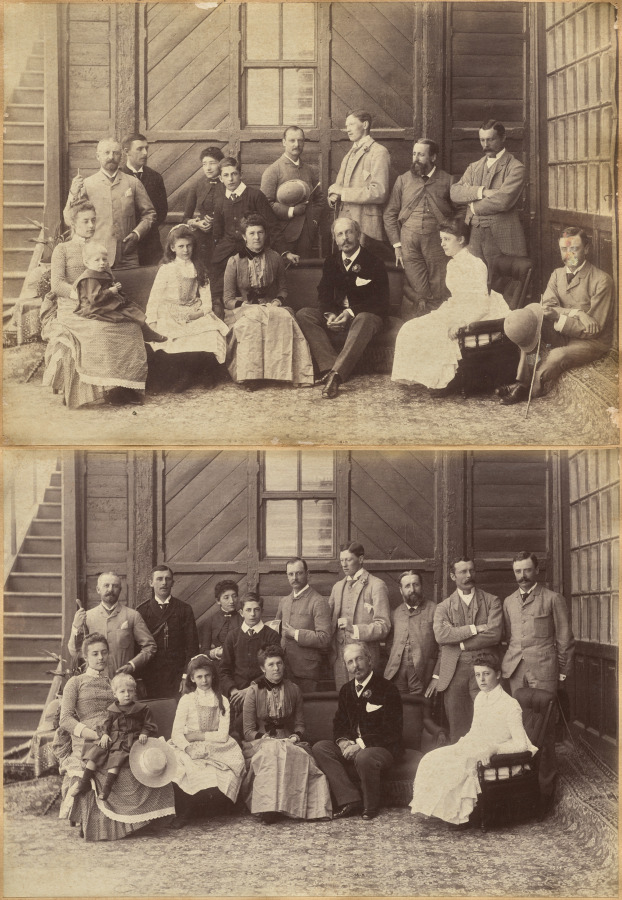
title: Shimla 17th May 1887: Viceregal party. Lord William Beresford, Military Secretary, Captain Leonard Gordon A.D.C., Mademoiselle Clerc, The Honorable Basit Blackwood, Major F.R. Hamilton A.D.C., Mr. Oglivie Grant, Sir Donald Mackenzie Wallace K.C.E., Private Secretary, Dr. J. Findlay, Mrs. F.R. Hamilton, Master G. Hamilton, Lady Victoria Blackwood, H.E. The Countess of Dufferin, H.E. The Earl of Dufferin, Lady Hermione Blackwood, Lord Herbrand Russell, A.D.C. (recto); Viceregal Party Shimla (verso)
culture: India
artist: Raja Deen Dayal (Indian, 1844–1905)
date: 1887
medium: albumen print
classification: Photograph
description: These photographs are part of an album, now disassembled, of around 105 photographs taken in India between 1885 and summer 1887 that provide glimpses into the lives of the British colonial elite and royal and upper-class Indians. The museum holds another group of 37 pictures from this album (2016.266), which was probably commissioned by a British civil servant visiting or working in India around 1888 as a personal souvenir of his experiences there.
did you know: Raja Deen Dayal is regarded now, and was considered during his lifetime, to be India’s most important 19th-century photographer.